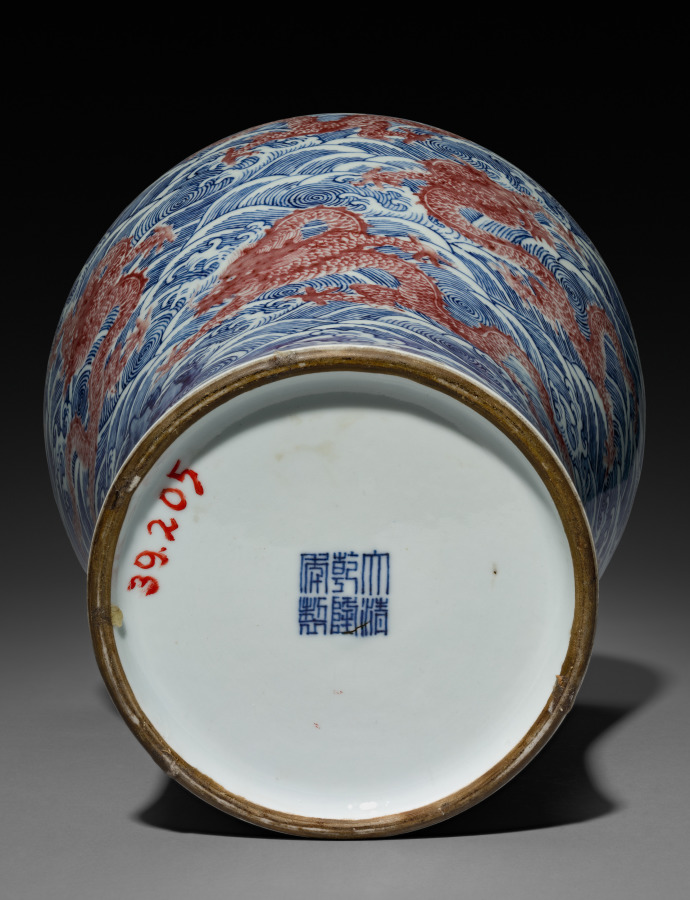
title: Bottle Vase with Dragons and Waves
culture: China, Jiangxi province, Jingdezhen kilns, Qing dynasty (1644-1911), Qianlong mark and reign (1736-95)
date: 1736–95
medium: Porcelain decorated in underglaze cobalt blue and copper red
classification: Ceramic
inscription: 大清乾隆年制